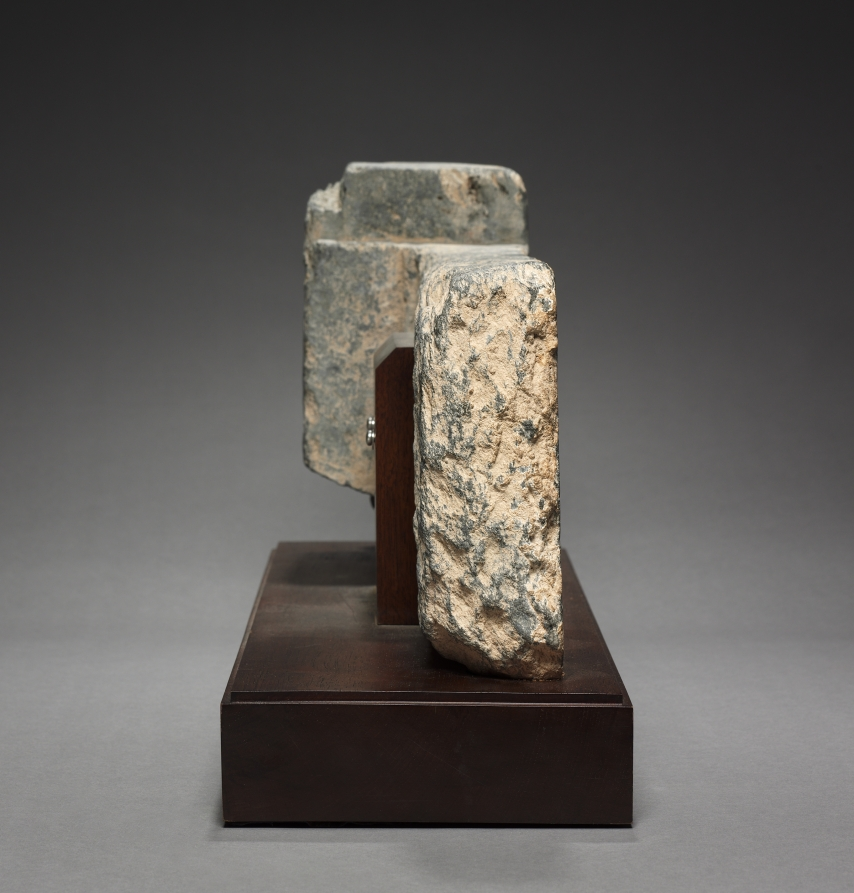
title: Bacchanalian Relief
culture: Pakistan, Gandhara, Kushan period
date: 200s CE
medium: schist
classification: Stone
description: Grape vines create vignettes with scenes of drunken revelry on this architectural carving that once fit by joinery to other carved stone blocks at the base of a Buddhist monument. Bacchus himself, the Greco-Roman god of wine, may be the third figure from the left; bearded, portly, and inebriated, his garment slips as he collapses. Cupid and Aphrodite appear in the vignette on the right next to an amorous couple. On the side is a female nature divinity, grasping the branch of a tree, but unlike her counterparts from farther south in India, she is clothed in a long tunic, pants, and scarf associated with the dress of the Central Asian nomadic groups.